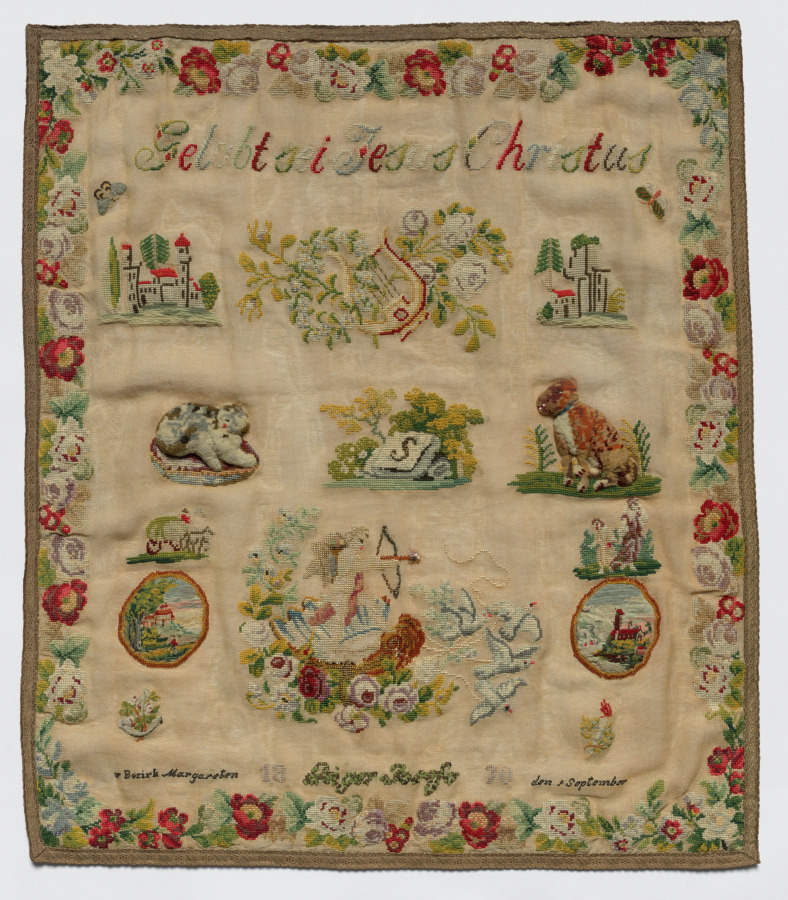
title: Sampler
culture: Germany, 19th century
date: 1870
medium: embroidery; wool on woolen canvas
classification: Sampler